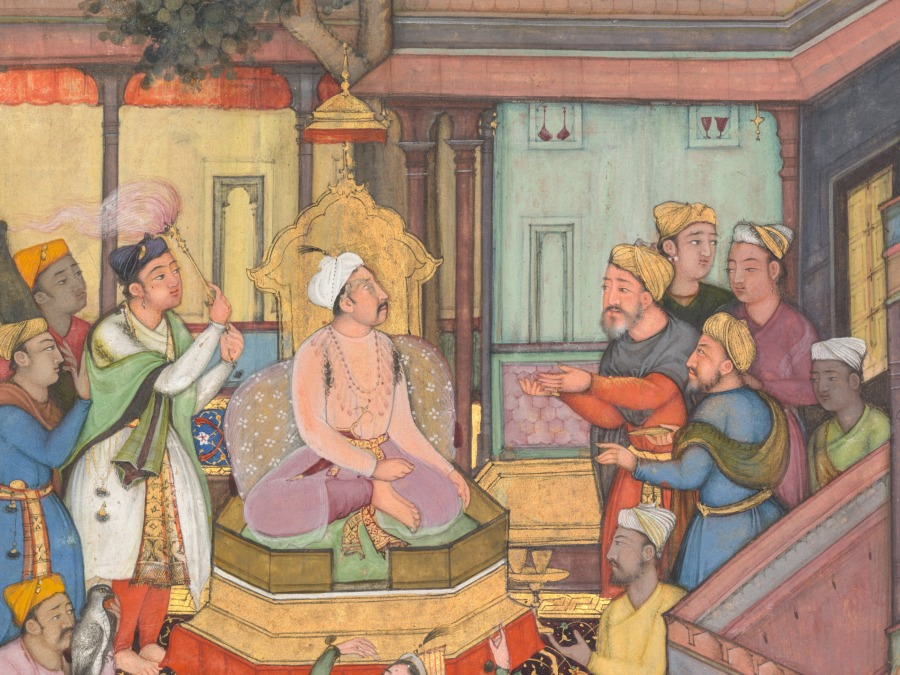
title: Circumcision ceremony for Akbar’s sons, painting 126 from an Akbar-nama (Book of Akbar) of Abu’l Fazl (Indian, 1551–1602)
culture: Mughal India, court of Akbar (reigned 1556–1605)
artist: attributed to Dharam Das (Indian, active c. 1580–1605)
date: c. 1602–3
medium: gum tempera, ink, and gold on paper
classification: Painting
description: This page is from a copy of the biography of Akbar that was completed not long before his death in 1605. It depicts him much younger, during the festivities held on October 22, 1573, in his newly built capital city of Fatehpur Sikri, near Agra, on the occasion of the circumcision ceremony for his three young sons. Dancers in Chaghatai Turkish dress perform as Akbar’s weight in gold is being distributed to the poor. Akbar wears a simple white tunic, or jama, stained at the armpits by aromatic musk. A curved dagger in a red velvet sheath is tucked into his golden sash, and he is crowned with a white crested turban.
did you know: An attendant strokes Akbar’s hunting falcon, perched on a glove.